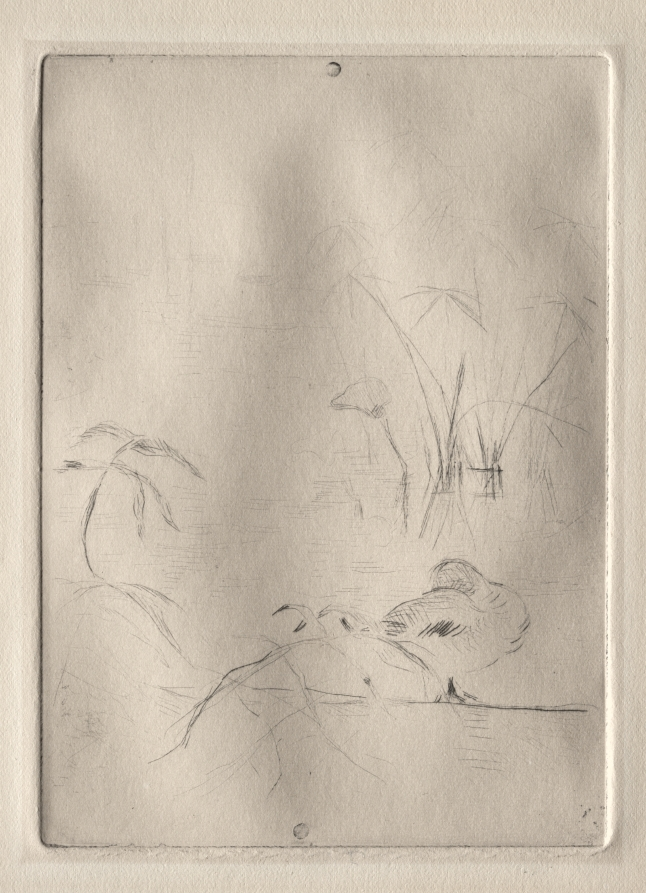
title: The Duck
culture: France, 19th century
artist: Berthe Morisot (French, 1841–1895)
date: 1888–90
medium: etching and drypoint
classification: Print